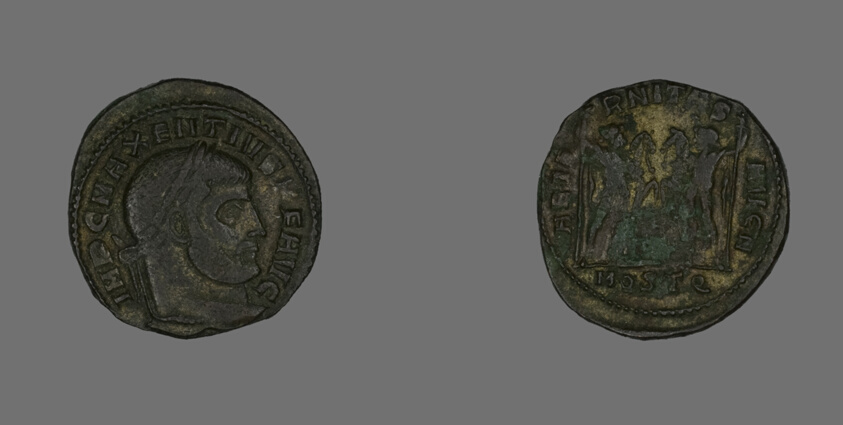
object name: Coin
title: Follis (Coin) Portraying Emperor Maxentius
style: roman (ancient, style or period), ancient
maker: Roman, minted in Ostia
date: 309-312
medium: Bronze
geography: Roman Empire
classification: coin; ancient art